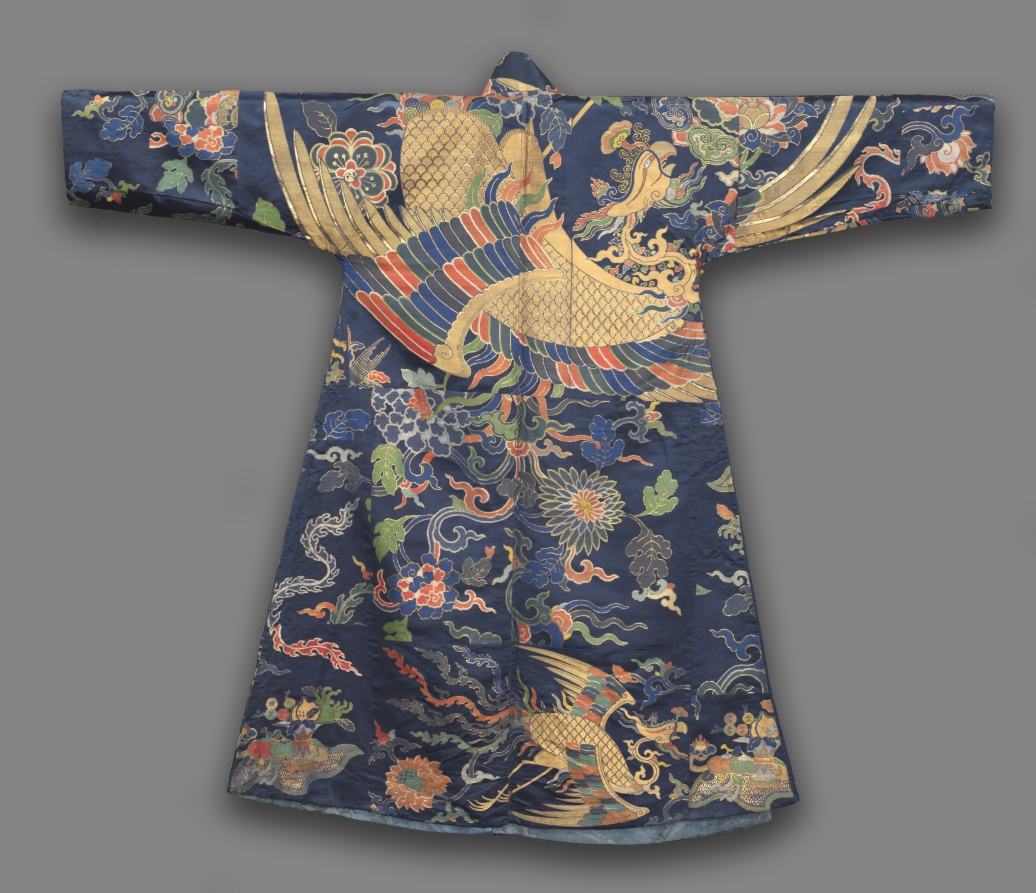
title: Tibetan Man's Robe, Chuba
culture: China, Qing dynasty (1644-1911), Kangxi period (1662-1772)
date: late 1600s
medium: Silk, gilt-metal thread of two kinds: satin weave with supplementary weft patterning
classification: Garment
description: This magnificent robe for a Tibetan lama or an aristocrat was originally a Chinese imperial wall hanging. Tibetan tailors cut it into 60 separate units, reassembling the fabric for a completely new and bold design. The wearer of such a garment must have impressed bystanders by his striking appearance. What you see here is the robe’s back side. Textiles played an important role in Chinese diplomacy with foreign governments. Diplomatic gifts of silk served to pacify border populations and to maintain balanced power relationships. Over centuries the Chinese court endeavored to keep a stable relationship with powerful Tibetan Buddhists. During the Qing dynasty (1644–1911) the Chinese court began to send gifts of court garments and furnishings to Tibet where they were altered to create Tibetan-style robes.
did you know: Large, splendid gold-thread phoenixes have pride of place on the front and back of the robe, complemented by two smaller but equally resplendent phoenixes below.